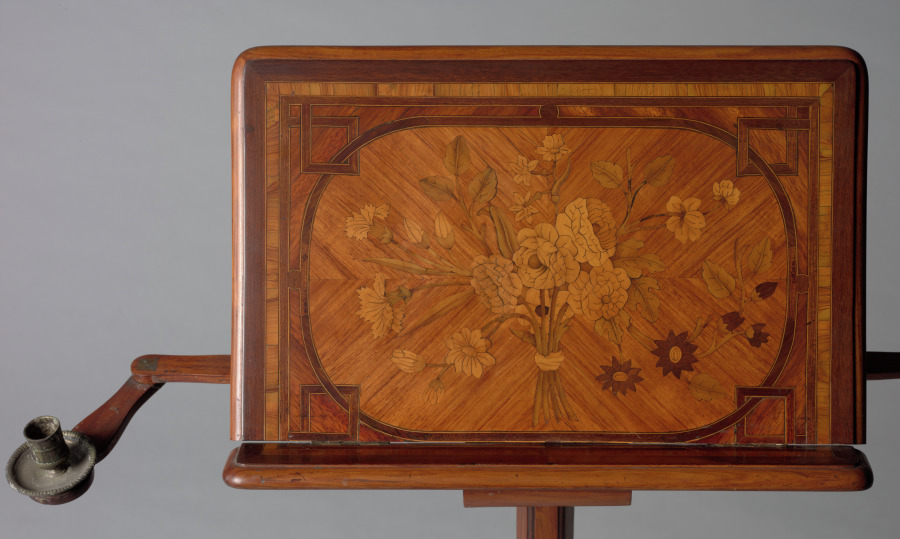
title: Music Stand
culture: France, style of Louis XVI, 18th Century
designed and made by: Canabas (French, 1715–1797)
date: c. 1775–1790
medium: satinwood veneer, with marquetry panel of various woods and metal candle holders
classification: Furniture and woodwork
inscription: signed: Canabas